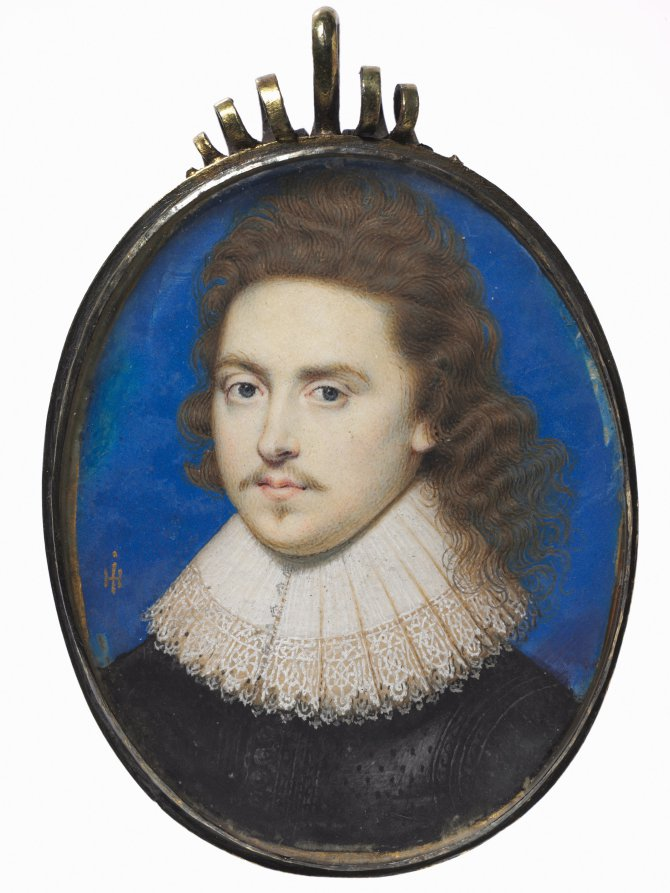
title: Portrait of a Man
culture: England, 17th century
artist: John Hoskins (British, c. 1590–1665)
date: c. 1625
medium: watercolor on vellum with gold border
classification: Portrait Miniature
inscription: signed left: IH [monogram]